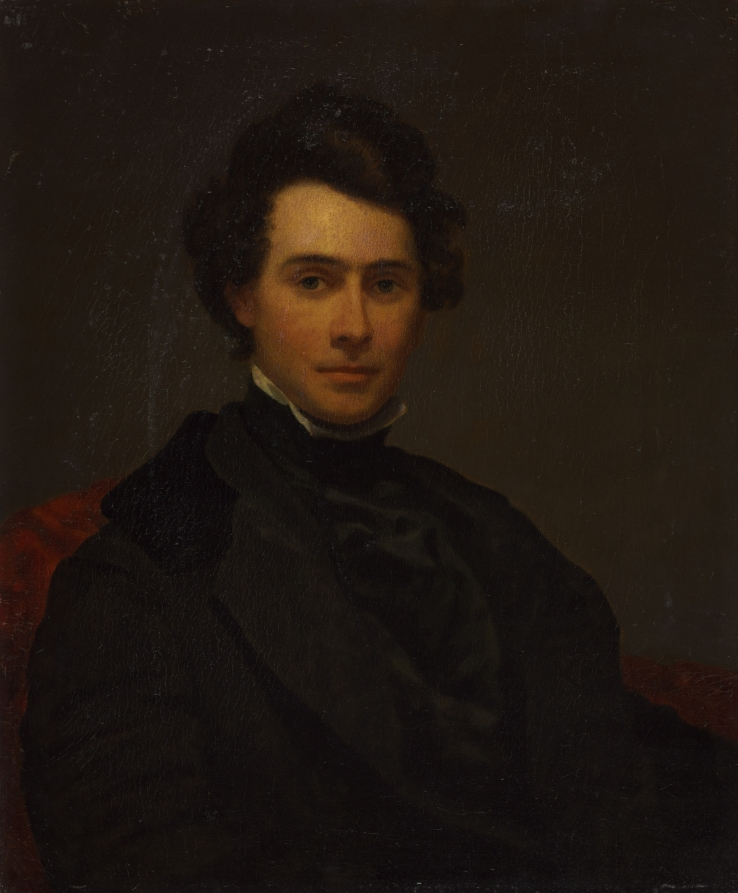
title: Tompkins Matteson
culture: America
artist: Charles Loring Elliott (American, 1812–1868)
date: c. 1840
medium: oil on canvas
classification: Painting